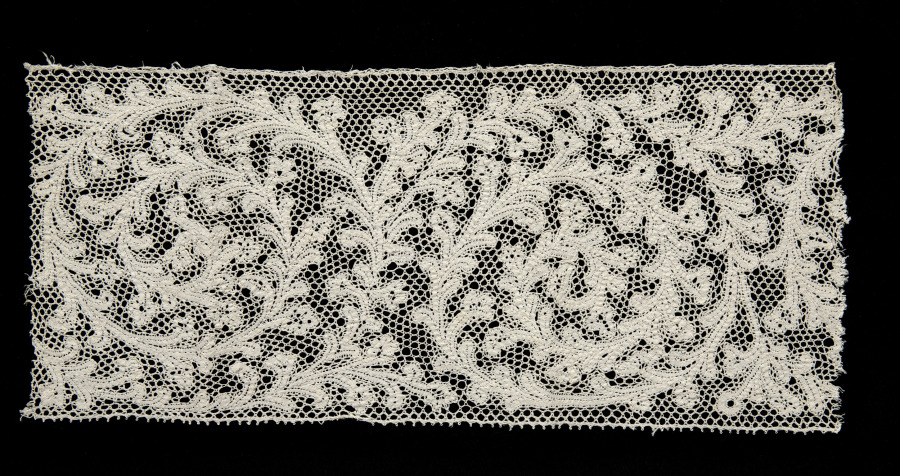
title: Lace Band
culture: Italy, Milan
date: 1600s–1700s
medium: Bobbin lace (Punto di Milano)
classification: Lace